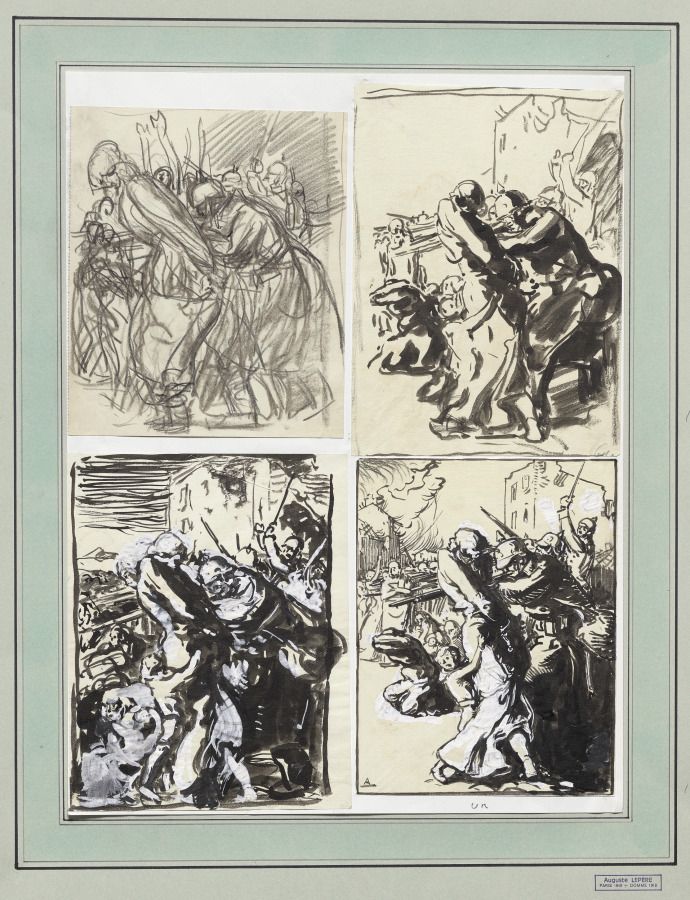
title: Fusilade dans une rue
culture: France, 20th century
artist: Auguste Louis Lepère (French, 1849–1918)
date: 1914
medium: brush and black ink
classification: Drawing